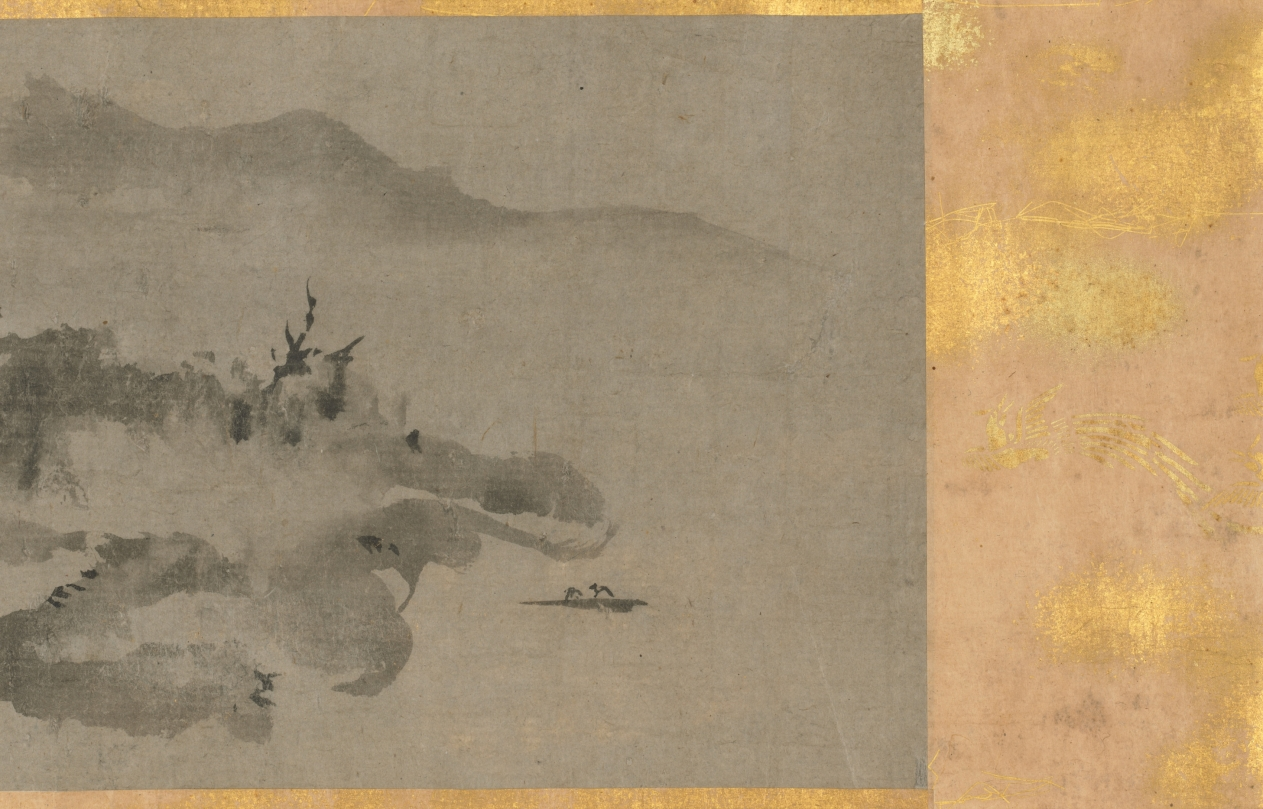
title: Eight Views of Xiao-Xiang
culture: Japan, Muromachi period (1392–1573)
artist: Sesson Shūkei (Japanese, c. 1492–c. 1577)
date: 1500s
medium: handscroll; ink on paper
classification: Painting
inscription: Signature and seal of artist at end of painting.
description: Eight Views of the Xiao and Xiang Rivers can be traced to 11th-century Chinese poems and paintings, the depiction of which had also become popular among Korean and Japanese painters. Xiao-Xiang refers to the region in present-day Hunan province where the Xiao and Xiang rivers converge. Few painters of the Eight Views had in fact seen the scenery; rather, they were trying to portray in ink and wash the lyrical qualities of dim light and a misty atmosphere typical of that region. Each of the poetic titles suggests a time of day, a season, or specific atmospheric conditions—subjects that challenged the abilities of the most talented artists. In this miniature painting (shukuzu) of the Muromachi period, Japanese Zen monk and painter Shukei Sesson depicted all eight views featured in Chinese prototypes: Wild Geese Descending to Sandbar; Returning Sails Off a Distant Coast; Mountain Market in Clearing Mist; River and Sky in Evening Snow; Autumn Moon over Dongting Lake; Night Rain on the Xiao and Xiang; Evening Bell from Mist-Shrouded Temple; and Fishing Village in Evening Glow.